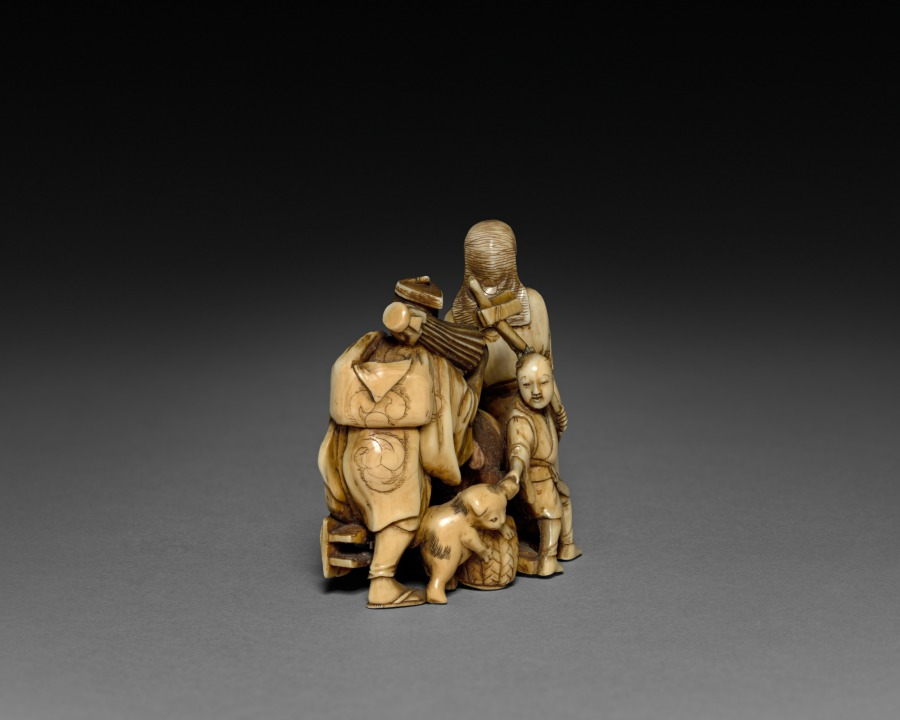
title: Procession with Four Figures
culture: Japan, Meiji period (1868–1912)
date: Late 1800s- Early 1900s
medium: ivory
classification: Ivory